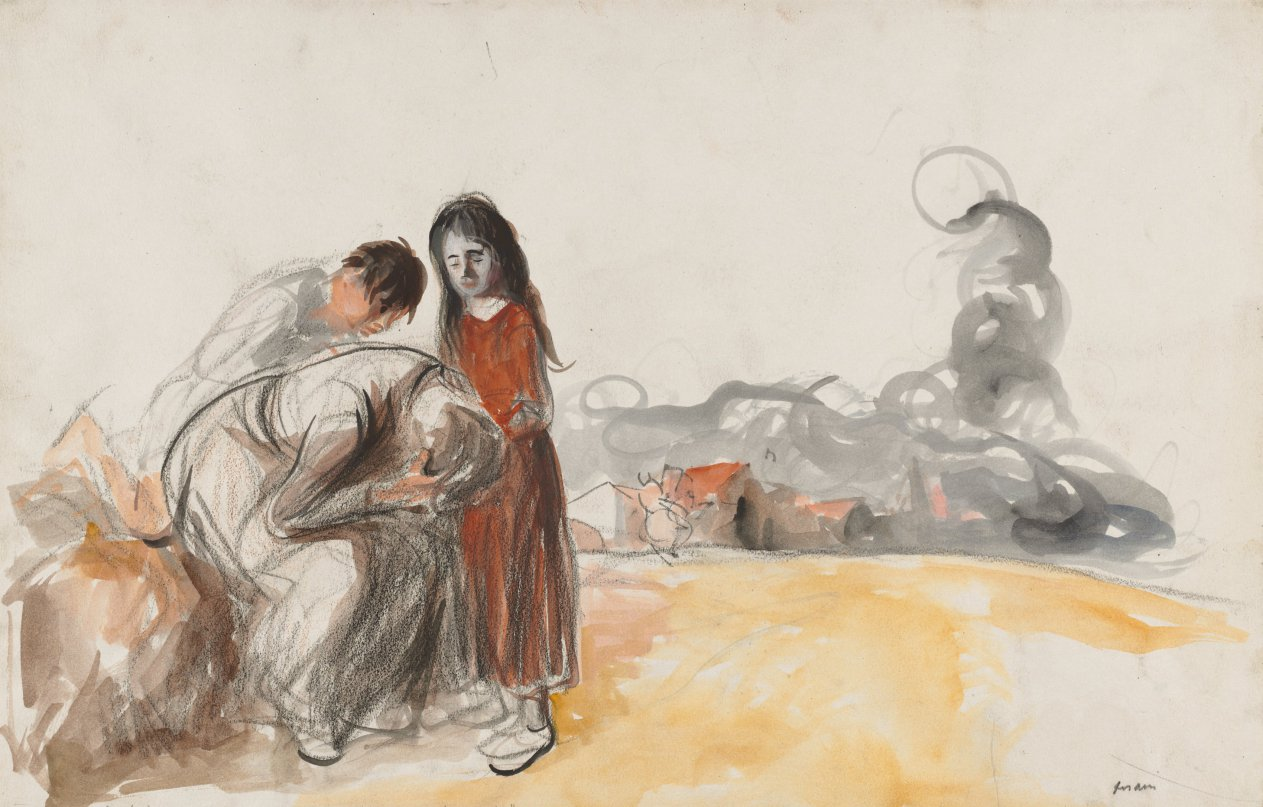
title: The Germans Have Gone Away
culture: France, late 19th-early 20th Century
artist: Jean Louis Forain (French, 1852–1931)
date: fourth quarter 1800s or first third 1900s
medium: gouache, watercolor, and gray wash over black crayon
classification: Drawing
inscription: signed, lower right, in graphite: forain ; lower left, in graphite: Le repli Boche (III) "Ils brûlent tout!...c'est qu'ils s'en vont." ; lower right, in graphite: A2167